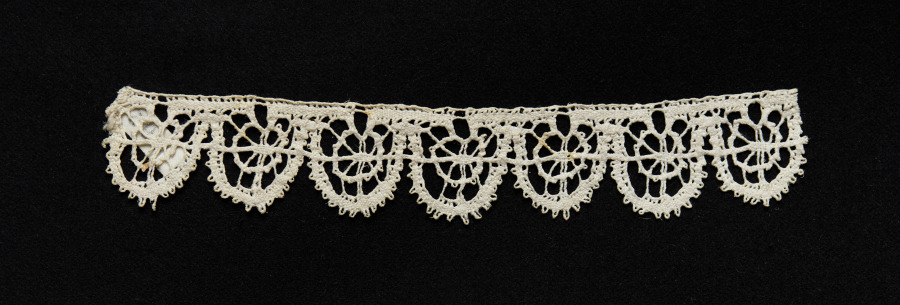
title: Lace Edging of Round Points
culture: Italy, Genoa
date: 1550–99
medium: Bobbin lace (needle lace, reticella design)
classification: Lace